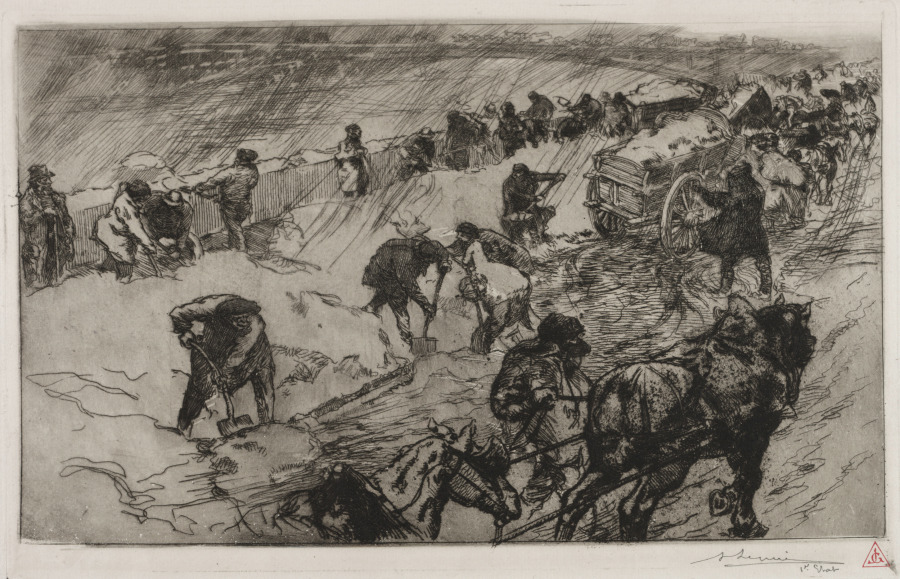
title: Combat contre la Neige, Quai aux Fleurs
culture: France, 19th century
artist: Auguste Louis Lepère (French, 1849–1918)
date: 1890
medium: etching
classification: Print